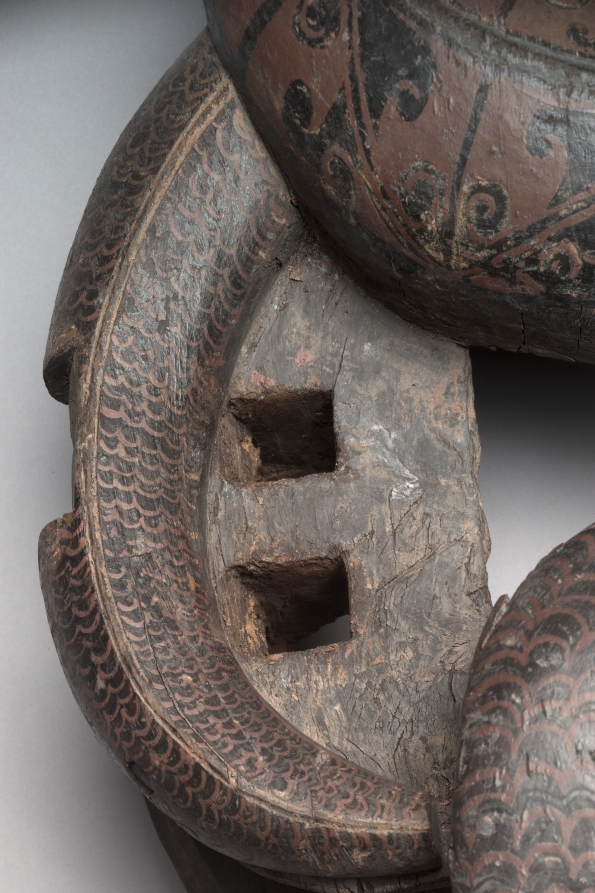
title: Cranes and Serpents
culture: China, reportedly from Hunan province, Changsha, Warring States period (475–221 BCE), State of Chu (c. 1046–223 BCE)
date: 475–221 BCE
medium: lacquered wood with polychromy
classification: Sculpture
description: A different style of ritual art developed in the state of Chu in South China. In addition to bronze vessels, lacquered wood artifacts expanded the repertory of ritual implements. This extraordinary sculpture was probably a drum stand for supporting a suspended drum in ritual ceremonies. It is unique among other excavated drum stands of the Chu, which typically show two birds standing on tigers. The theme of the bird stepping on the serpent was common in the Chu visual culture. Yet the slender proportions and seemingly flimsy structure of this particular set raise the question of whether it was utilitarian or mostly served symbolic functions in the tomb. The birds' and serpents' bodies have designs painted in red lacquer and yellow pigment against the black lacquer. Scientific analyses confirm the additional use of a blue or green pigment that has been discolored over time.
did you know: The cranes' long necks allowed a lightweight drum to be suspended from strings through the beaks, while the densely intertwined snakes provided a weighty base to stabilize the object during musical performances.